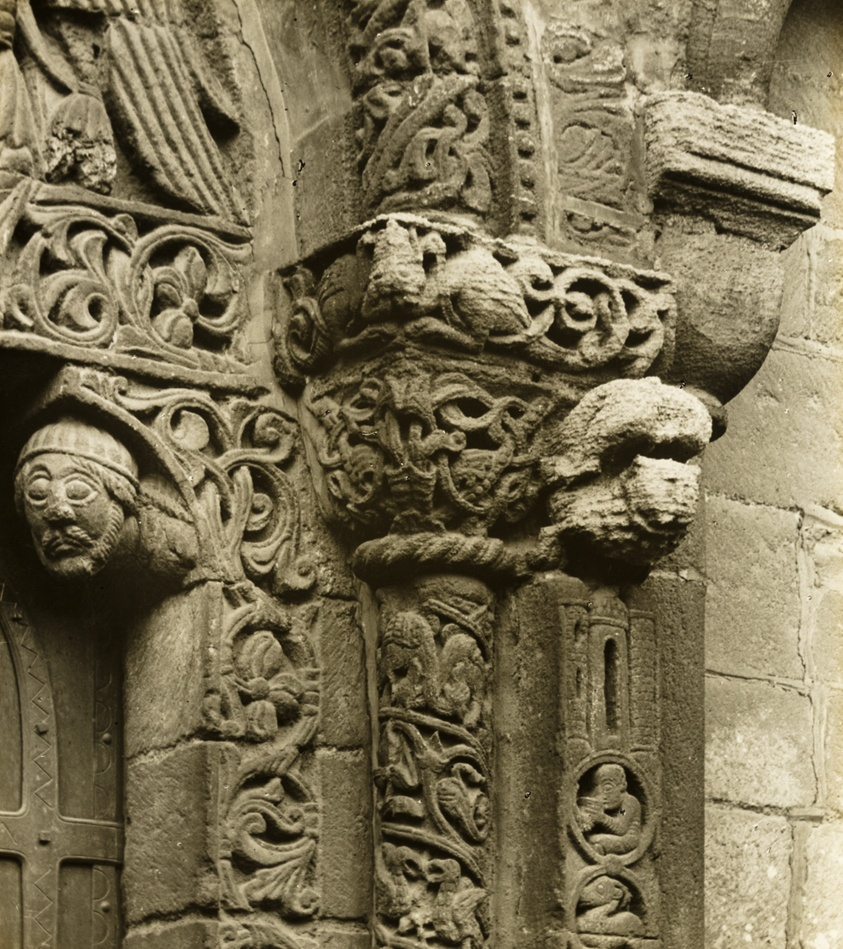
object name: Photograph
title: Ely Cathedral: Prior's Doors: Calilals West Side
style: Pictorialism, 19th century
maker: Frederick H. Evans (English, 1853–1943)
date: c. 1891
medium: Lantern slide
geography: England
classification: photograph; photography